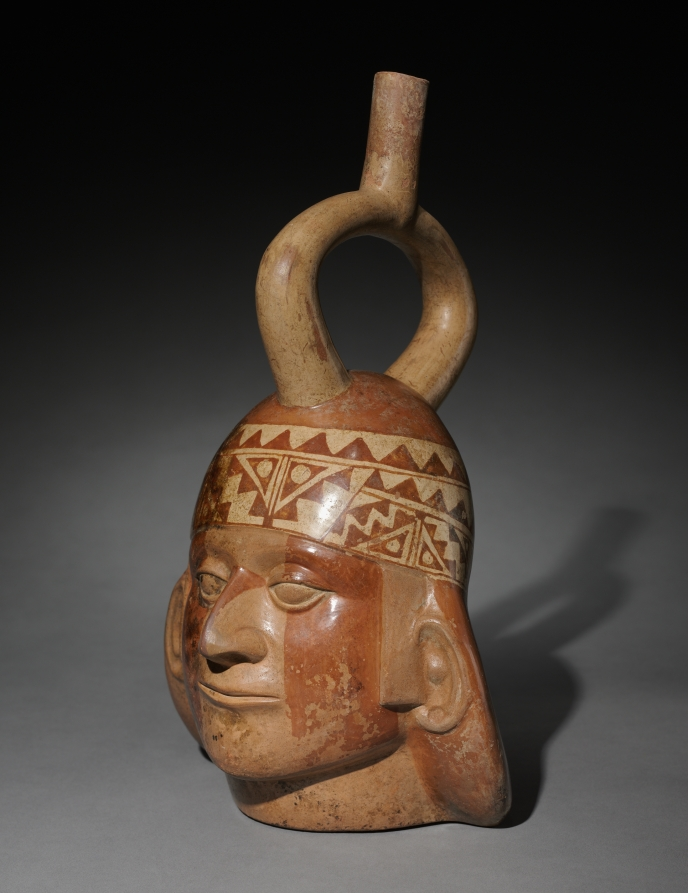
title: Portrait Head Vessel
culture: Peru, North Coast, Moche style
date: c. 200–550 CE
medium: earthenware with colored slips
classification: Sculpture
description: The Moche were unique in ancient Peru in creating realistic human portraits, usually in the form of ceramic vessels. In general, such vessels represent more than 750 individuals; identities are unclear but most are elite men, some probably rulers. The stirrup-shaped spout is a hallmark of Moche ceramic production.